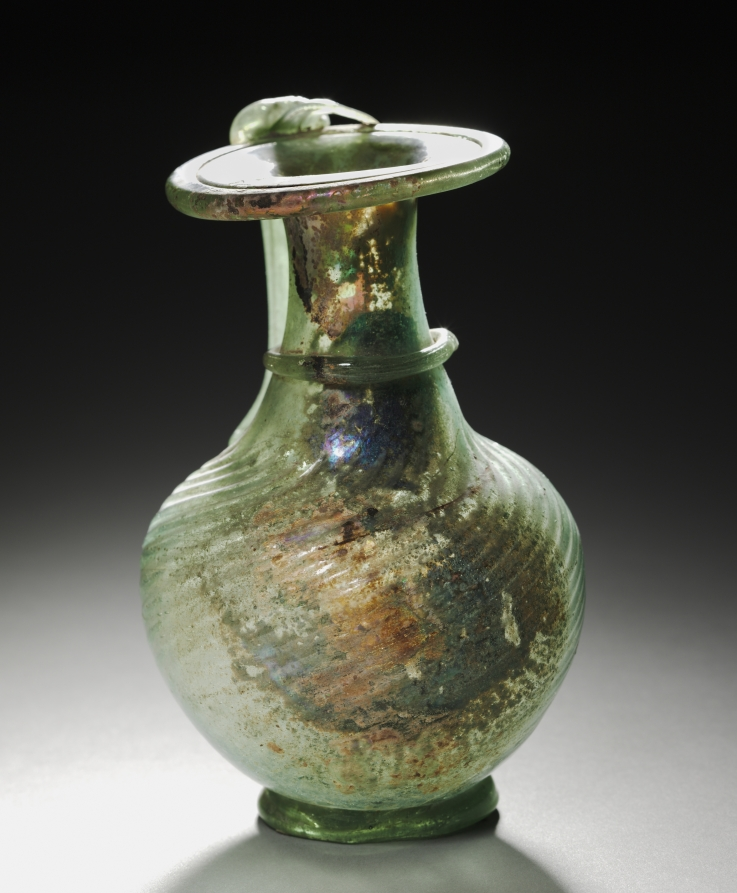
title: Pitcher with Handle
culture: Eastern Mediterranean, Roman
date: 300s CE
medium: glass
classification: Glass